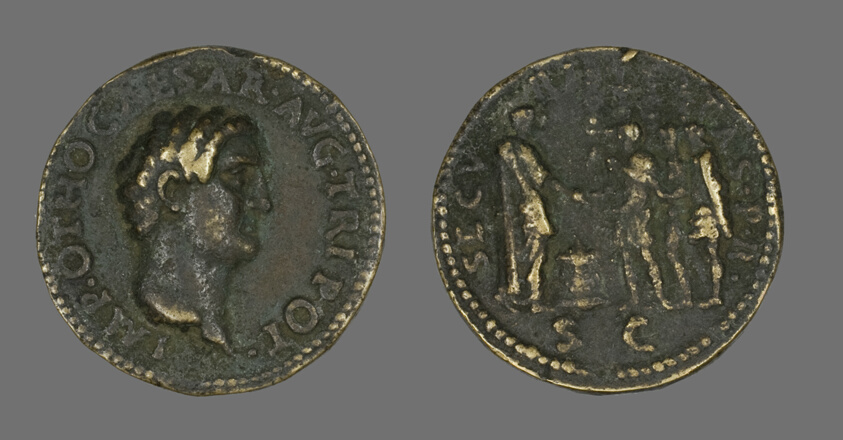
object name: Coin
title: Coin Portraying Emperor Otho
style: imperial (roman), ancient, roman (ancient, style or period)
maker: Roman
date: 69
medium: Bronze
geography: Roman Empire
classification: coin; ancient art